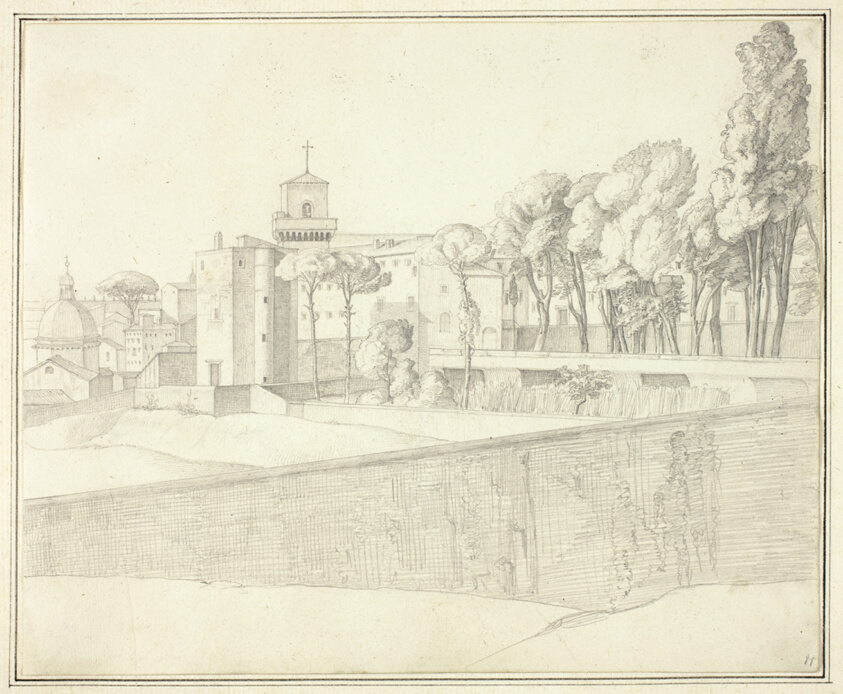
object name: Drawing and Watercolor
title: San Pietro in Vincoli, Rome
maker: Johann Martin von Rohden (German, 1778-1868)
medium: Graphite on ivory wove paper, hinged onto ivory laid paper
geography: Germany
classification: graphite; drawings (visual works); prints and drawing